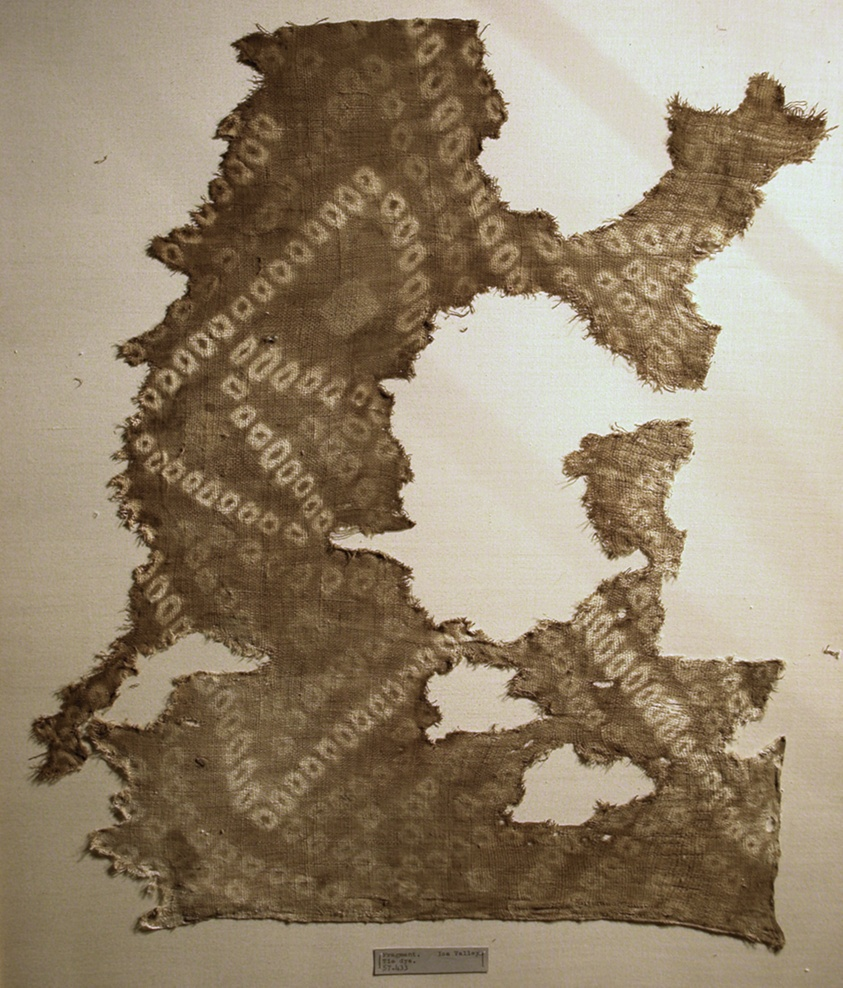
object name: Textile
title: Fragment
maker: Peru, south coast, Ica Valley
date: A.D. 1000/1476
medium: Cotton; tie-dyed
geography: Peru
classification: textile; weaving; weaving - printed